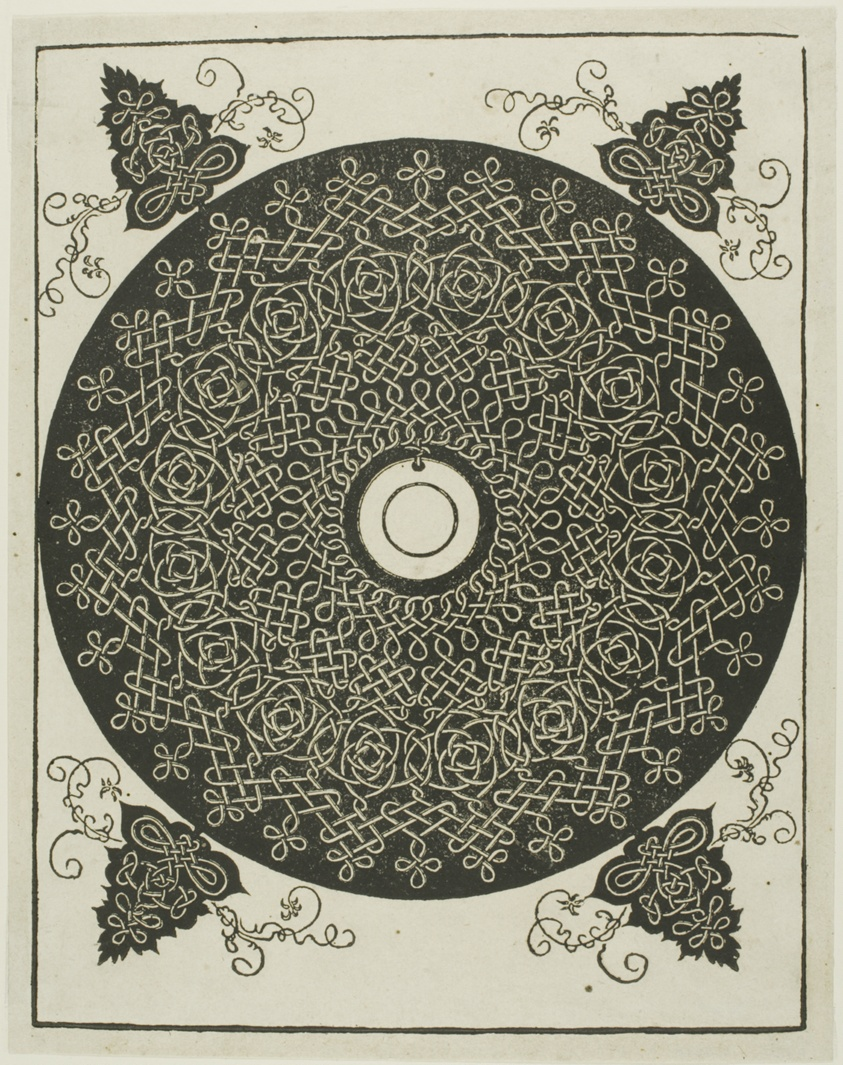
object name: Print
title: The Third Knot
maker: Albrecht Dürer (German, 1471-1528)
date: c. 1507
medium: Woodcut in black on ivory laid paper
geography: Germany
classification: woodcut; print; prints and drawing; paper